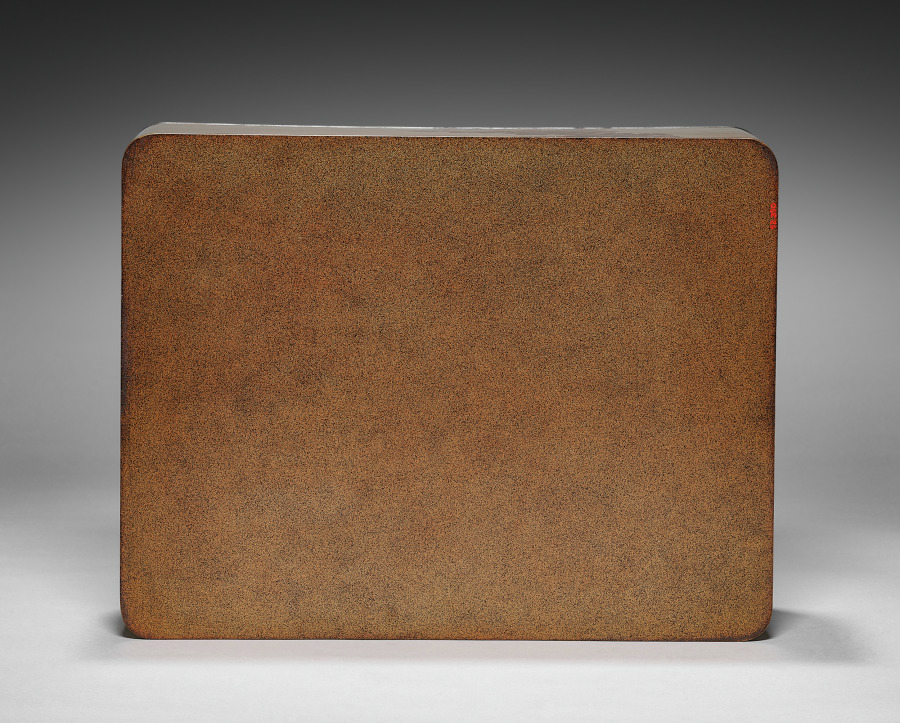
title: Document Box (Ryōshibako) with Chrysanthemum and Plum (base)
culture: Japan, Meiji period (1868–1912)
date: late 1800s-early 1900s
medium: gold lacquer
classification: Lacquer